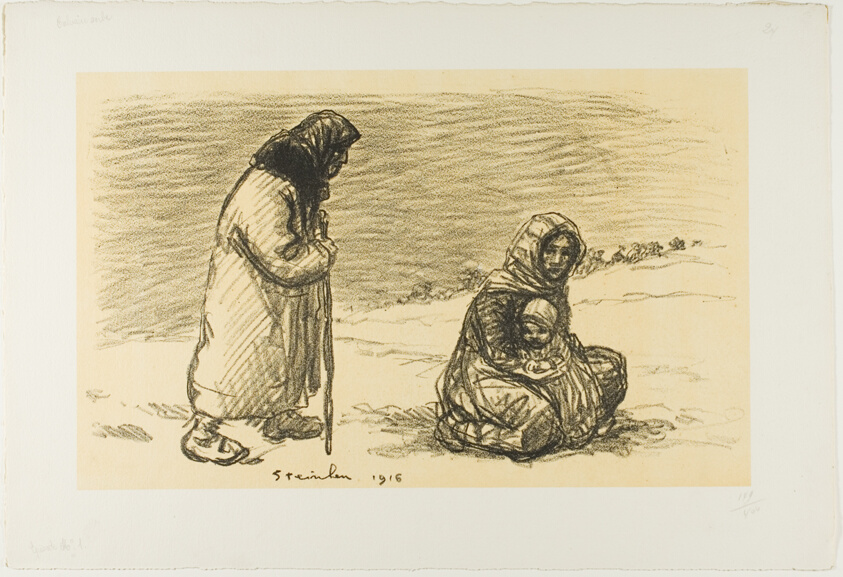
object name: Print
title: Serbian Cavalry, First Episode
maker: Théophile-Alexandre Steinlen; French, born Switzerland, 1859-1923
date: 1916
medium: Lithograph in black over a fawn tint on thick off-white wove paper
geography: France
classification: lithograph; print; prints and drawing